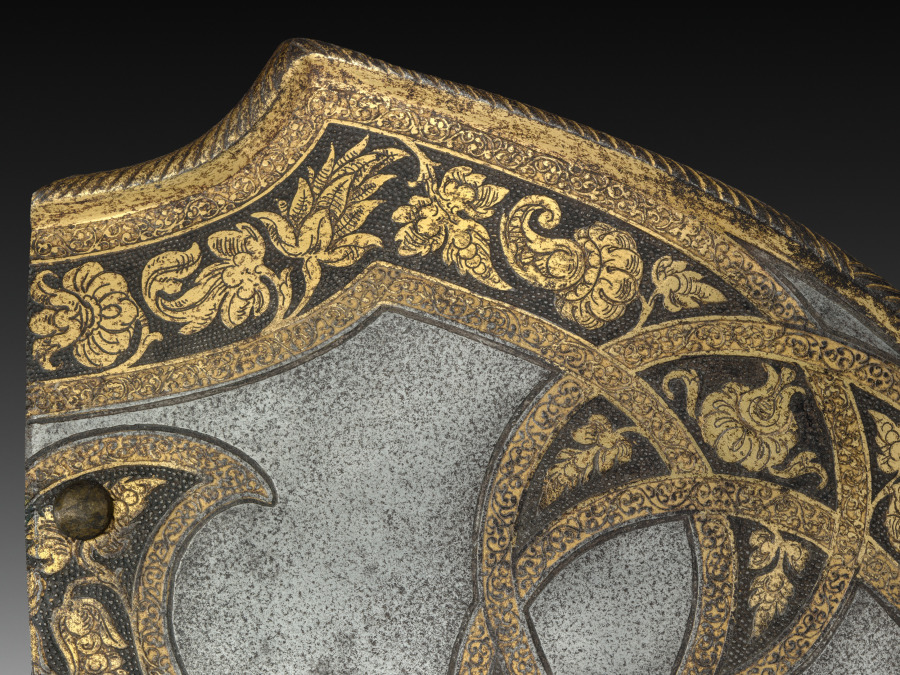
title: Pommel Plate of a Saddle (from the "Flechtband" Garniture of Rudolf II and Archduke Ernst, Vienna)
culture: Germany, Augsburg, 16th century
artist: Anton Peffenhauser (German, 1525–1603)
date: c. 1571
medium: blued, etched, and gilded steel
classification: Arms and Armor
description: This plate, one of two was once part of a saddle, are from tournament armor for man and horse made for the sons of Emperor Maximilian II, archdukes Rudolf and Ernst. Most of the remaining elements of this armor are still in the collections of the Imperial Armouries in Vienna. The decorative pattern (in the imperial colors of black and gold) forms elegant knots, with distinctive foliage and hop sprigs filling the loops.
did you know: Once part of a saddle, this plate protected the rider's thigh.